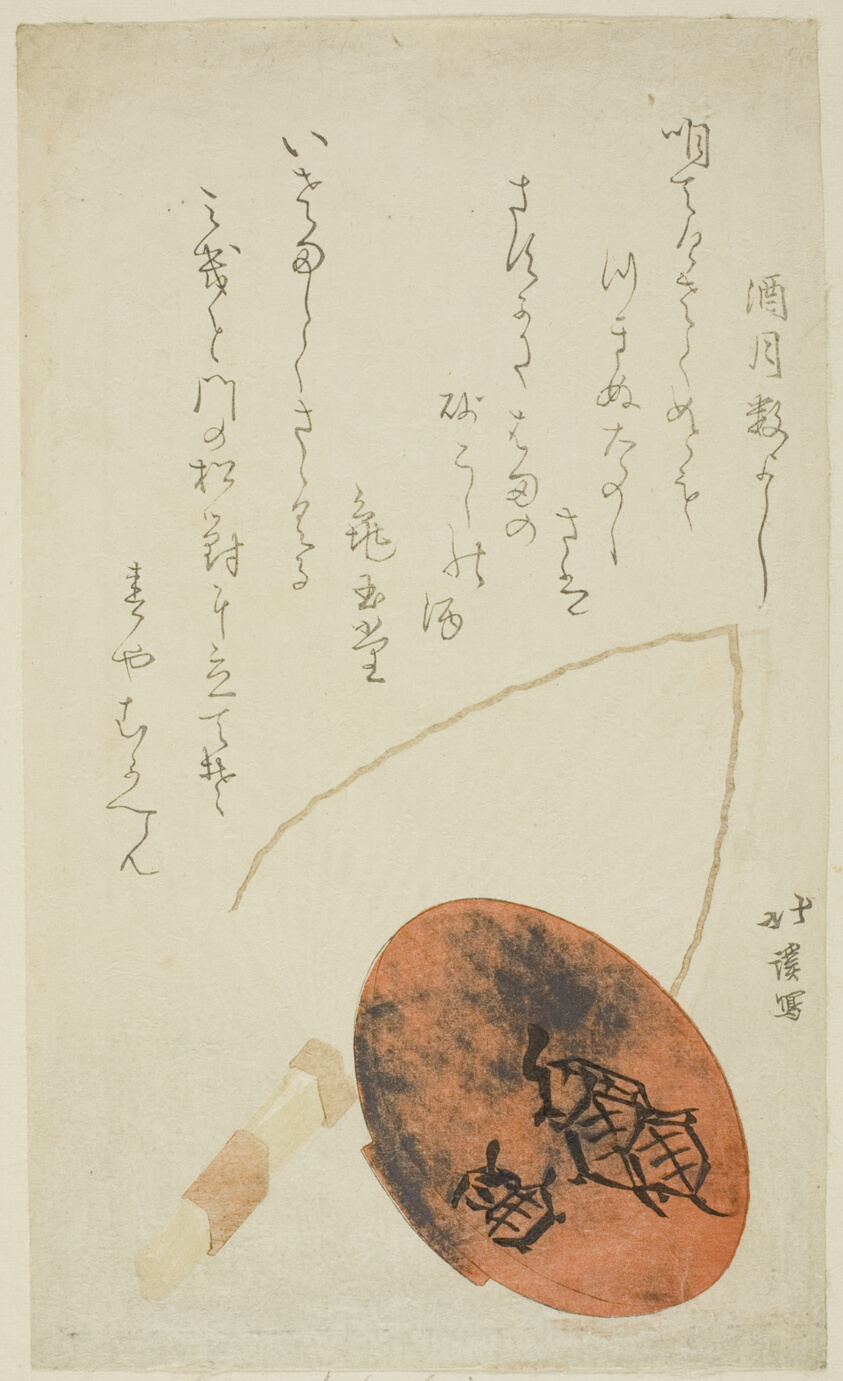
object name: Print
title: Sake cup and fan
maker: Totoya Hokkei (Japanese, 1780-1850)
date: Early 19th century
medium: Color woodblock print; surimono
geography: Japan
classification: woodblock print; print; asian art